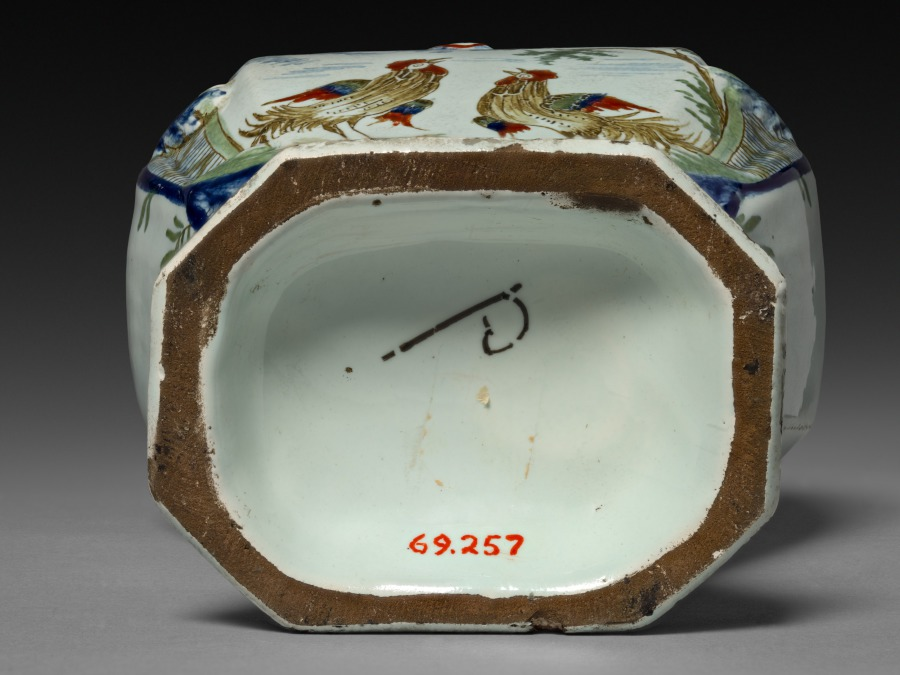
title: Vase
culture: Netherlands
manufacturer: probably by Het Bijltje Factory (Dutch)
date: mid 1700s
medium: delftware (tin glazed earthenware)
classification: Ceramic